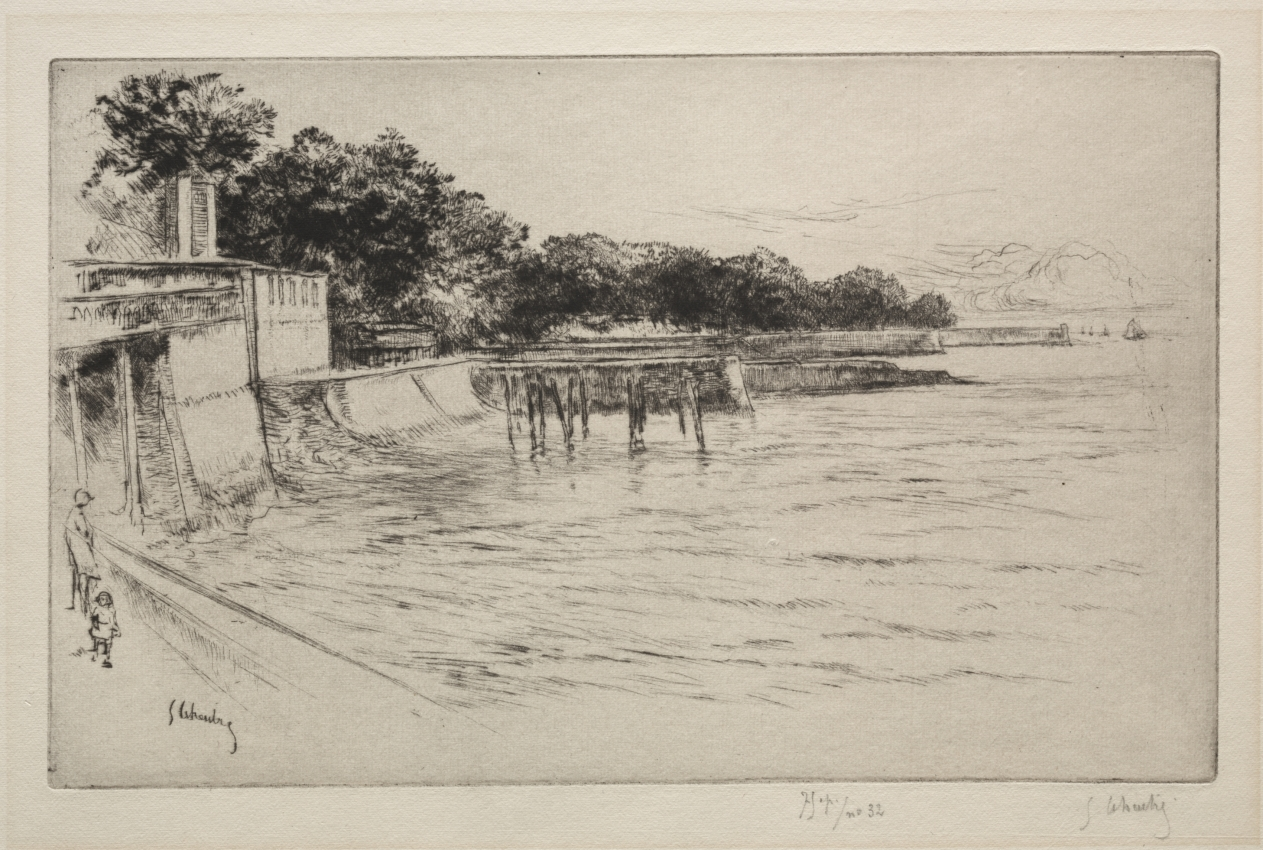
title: La grève désertée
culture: France, 19th-20th century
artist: Gustave Leheutre (French, 1861–1932)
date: c. 1926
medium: drypoint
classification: Print